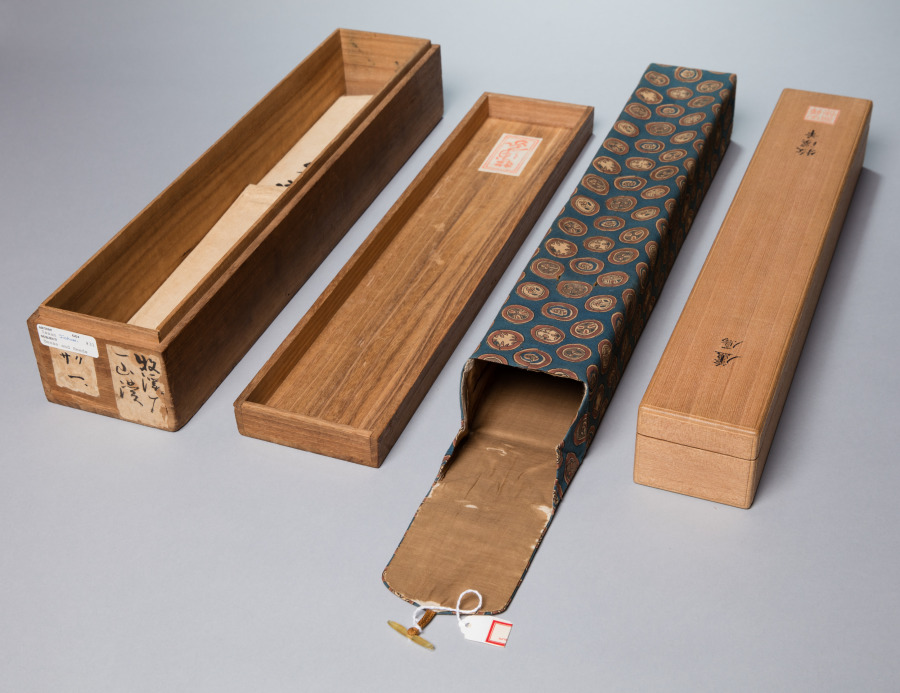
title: Reeds and Geese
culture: Japan, Kamakura period (1185–1333)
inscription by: Yishan Yining [Issan Ichinei] (Chinese, 1247–1317)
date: 1314–17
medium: hanging scroll; ink on paper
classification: Painting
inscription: signed: Issan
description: Reeds and geese has been a common pairing in Chinese literary and visual culture for many centuries. This painting presents the contribution of a Japanese amateur painter, almost certainly a Zen Buddhist monk, to Japan’s fledgling efforts to add the theme to its own cultural vocabulary in the early 1300s. As was customary at the time in Japan, the painter did not sign or seal his work; the inscription, a poem added to the painting by the eminent émigré monk Yishan Yining, along with his signature and seal, was of far greater cultural value. Today, the modestly sized painting has tremendous significance as one of the earliest surviving examples of Japanese ink paintings with reeds and geese.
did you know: Tokyo National Museum owns a copy of this painting made by Kano Gyokusen (1796–1864) when he was 14 years old.